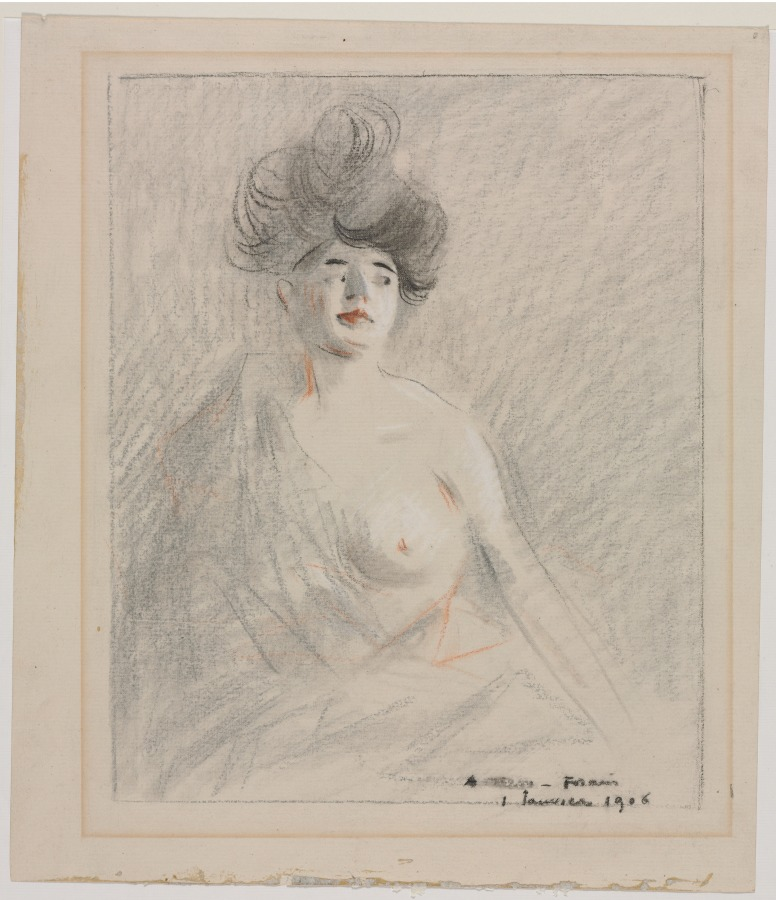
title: Courtesan (recto) Figure Sketches (verso)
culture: France, early 20th Century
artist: Jean Louis Forain (French, 1852–1931)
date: 1906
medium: black, red, and white chalk; framing lines in black chalk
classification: Drawing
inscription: signed, lower right, in black crayon: A [illegible, scraped away] - Forain / 1 Janvier 1906